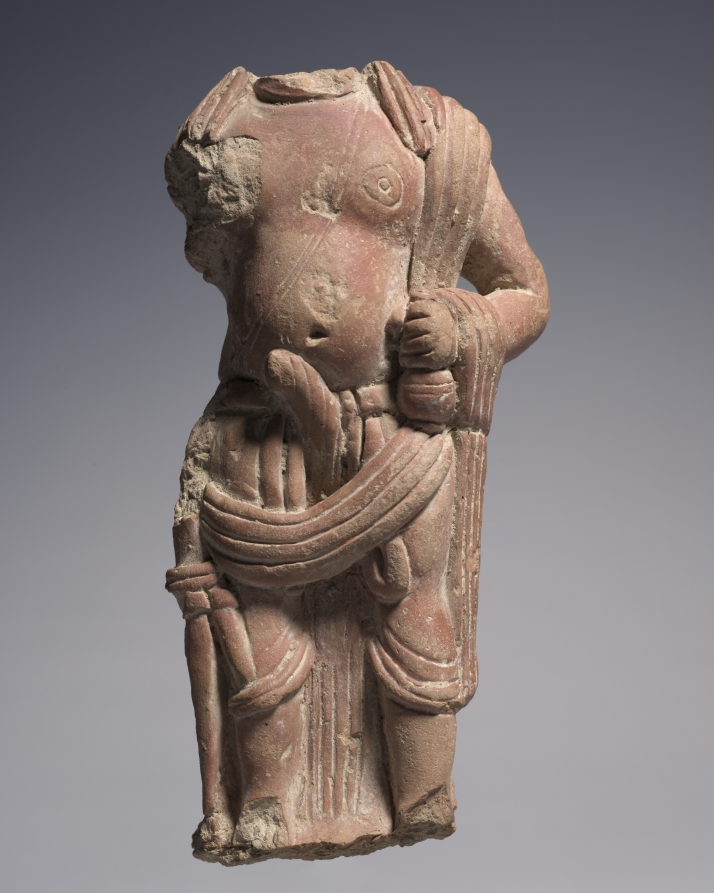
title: Male Fertility Divinity, Possibly Shiva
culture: Northern India, possibly Mathura, Kushan period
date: c. 120–200 CE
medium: terracotta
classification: Sculpture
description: This figure combines an unusual set of attributes. He has long dreadlocks over his shoulders, like an ascetic, and he holds a water pot, like a Brahmin or naga (serpent deity). Also, he seems to carry a sword and dagger like a warrior and is ithyphallic, indicating his virility and fecundity. He may best be identified as a local divinity worshipped for purposes of increasing fertility, but he could also be recognized as an early form of the Hindu god Shiva.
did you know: This sculpture was first made from a mold, then subsequently hand modeled.